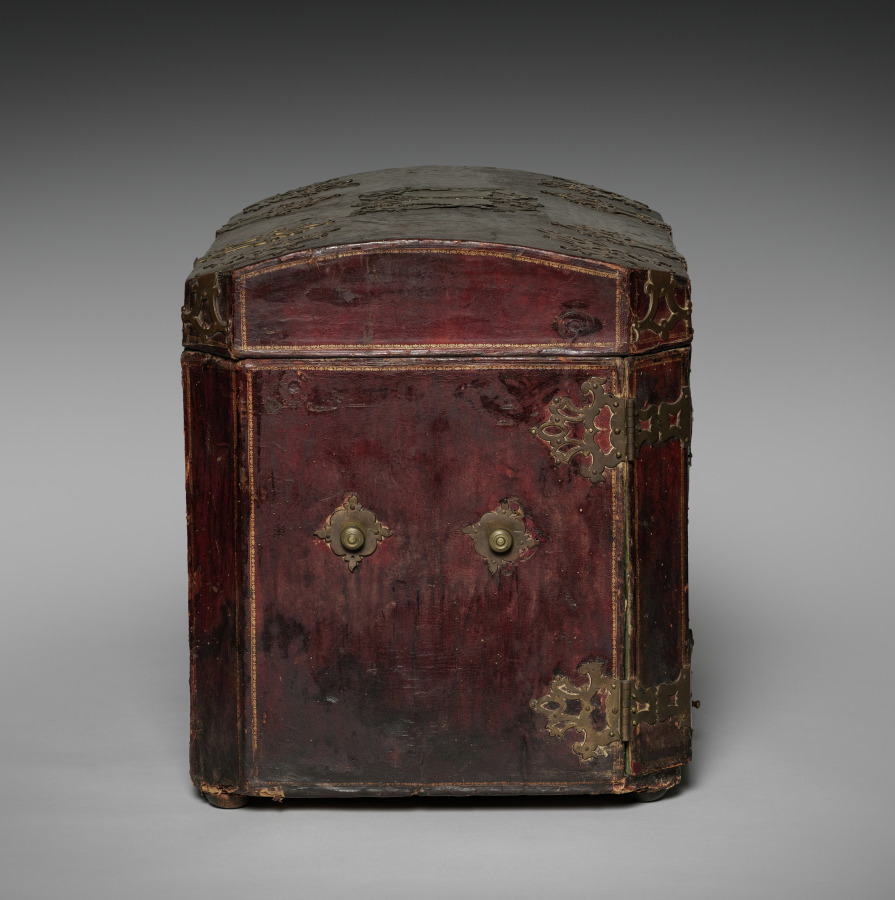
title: Chest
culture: Italy, Venice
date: 1700s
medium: leather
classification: Miscellaneous